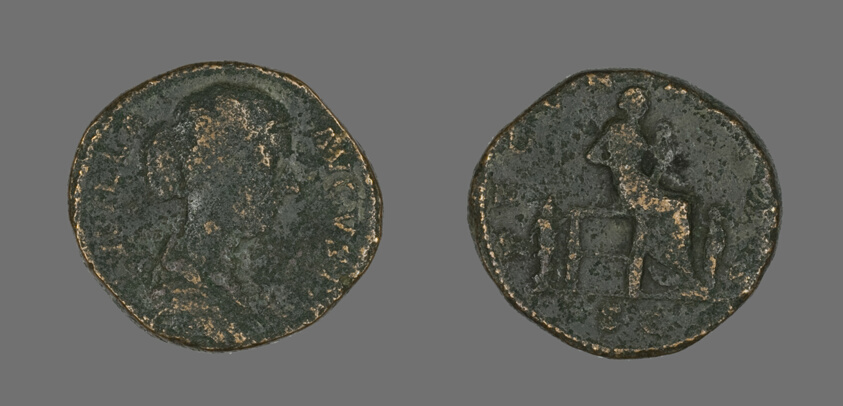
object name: Coin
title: Coin Portraying Empress Lucilla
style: imperial (roman), ancient, roman (ancient, style or period)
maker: Roman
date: 164-169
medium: Bronze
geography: Roman Empire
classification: coin; struck; ancient art